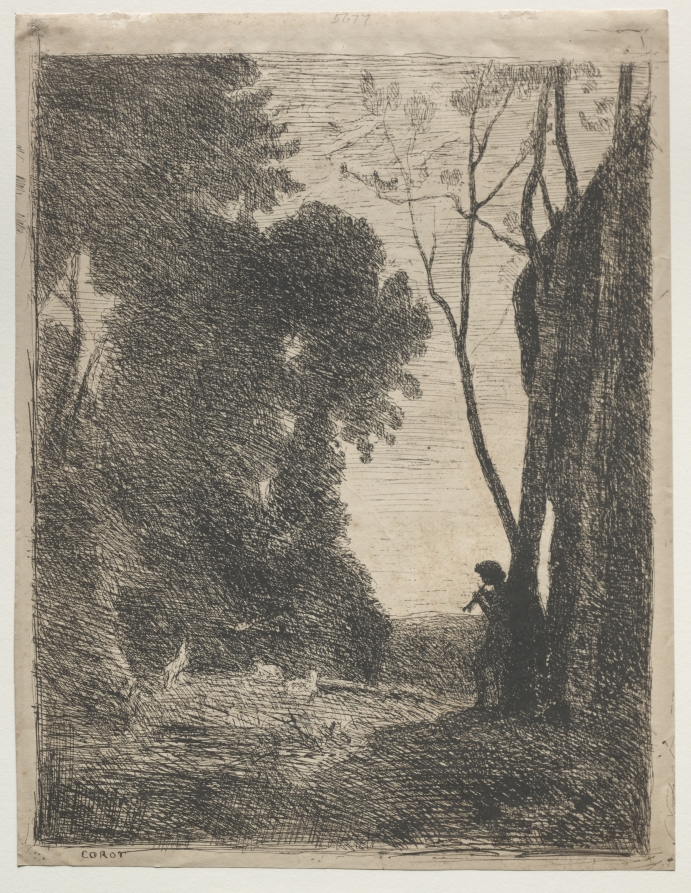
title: The Little Shepherd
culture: France, 19th century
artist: Jean Baptiste Camille Corot (French, 1796–1875)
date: 1855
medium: cliché-verre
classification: Print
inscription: signed, lower left: "COROT" in glass plate